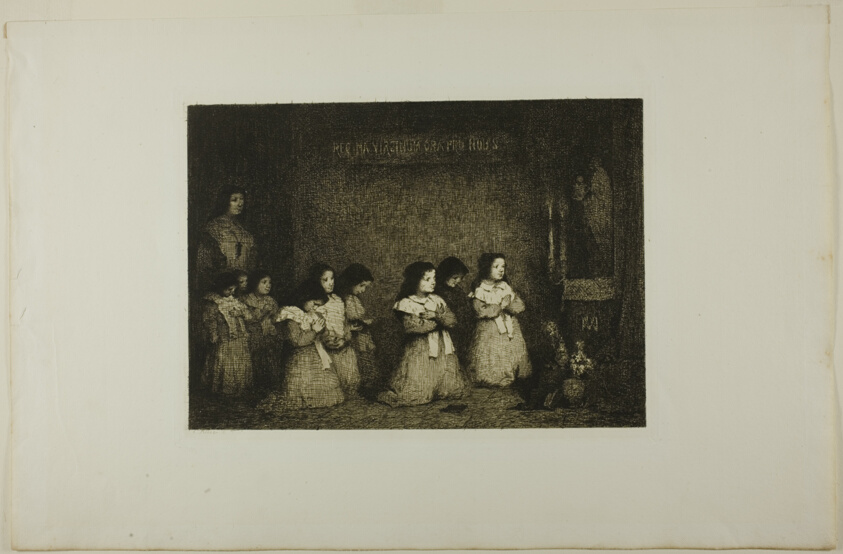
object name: Print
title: The Prayer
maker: Théodule Augustin Ribot (French, 1823-1891); published by Alfred Cadart (French, 1828-1875)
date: 1862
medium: Etching on ivory laid paper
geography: France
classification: etching; print; prints and drawing